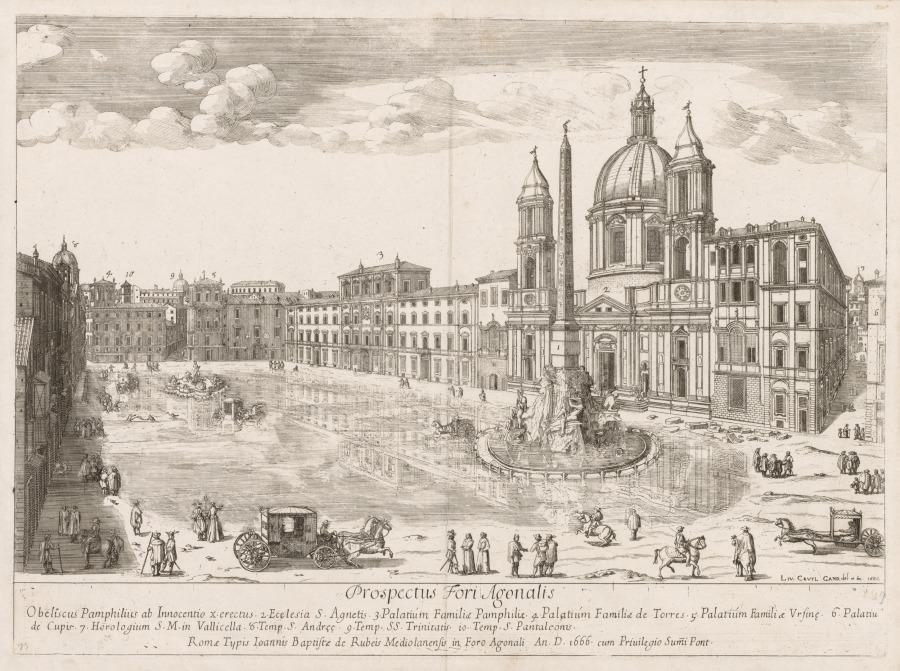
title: Piazza Navona from "Prospectus Locurum Urbis Romae Insign[ium]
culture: Flanders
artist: Lievin Cruyl (Flemish, c. 1640-c. 1720)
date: 1666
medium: etching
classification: Print